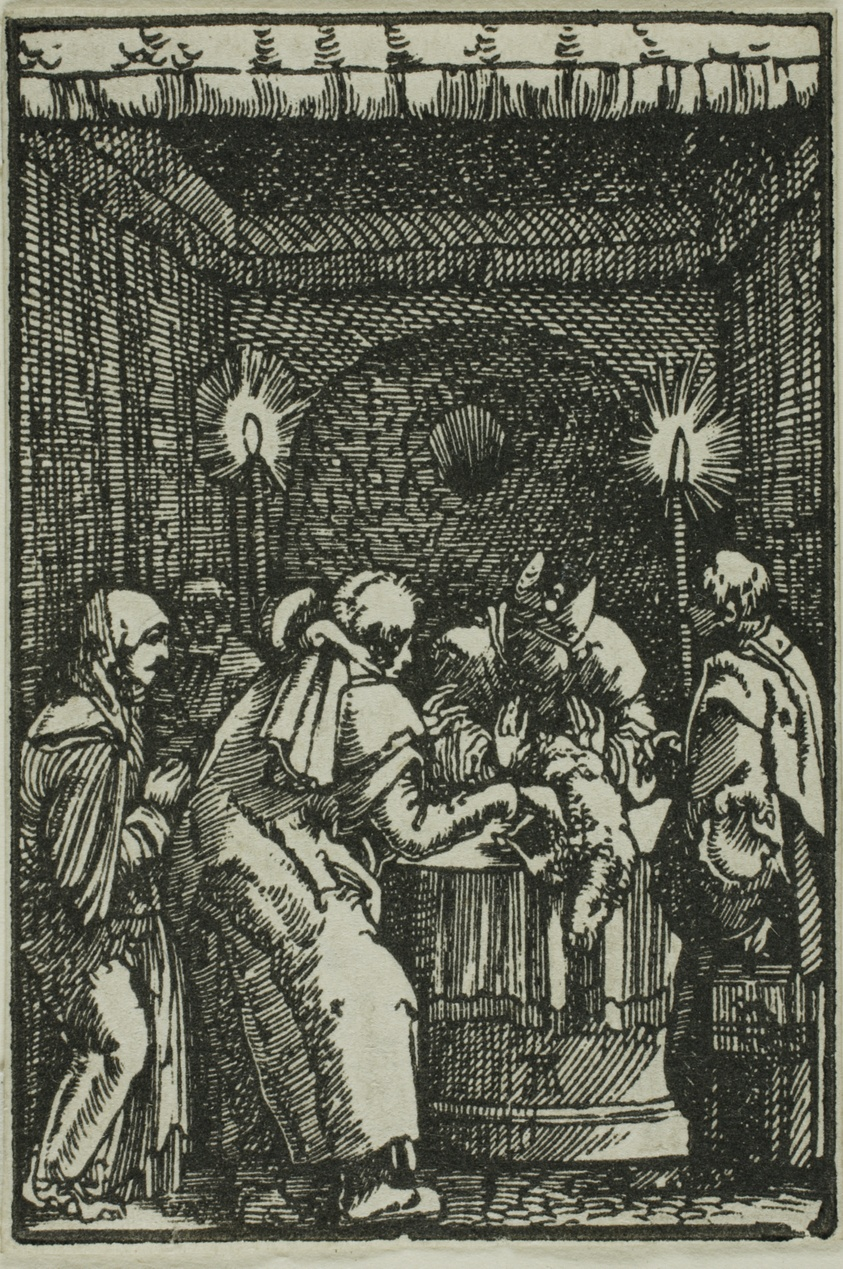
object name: Print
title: Joachim's Offering Refused, from The Fall and Redemption of Man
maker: Albrecht Altdorfer (German, c.1480-1538)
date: 1513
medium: Woodcut in black on ivory laid paper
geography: Germany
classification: wood engraving; print; prints and drawing